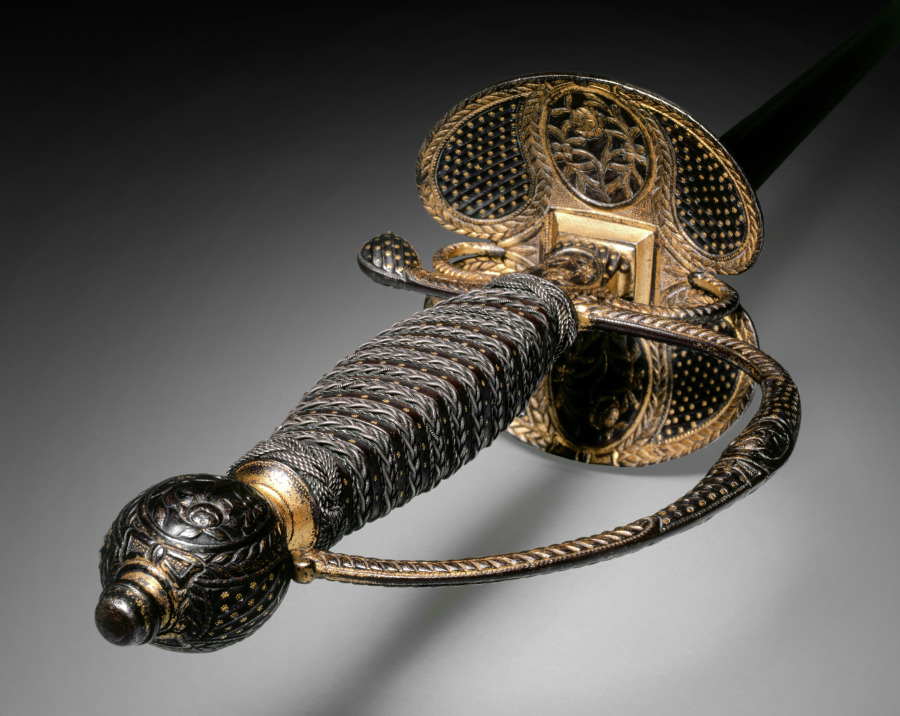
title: Small Sword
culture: France, Paris (?), 18th century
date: c. 1780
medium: forged steel blade; partially gilt and russet steel hilt; steel wire, leather bands, wood core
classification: Arms and Armor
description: During the 1700s, the small-sword emerged as a light, quick weapon. Like the rapier it was carried by unarmored civilians, the noblemen of the upper classes. Over time this delicate sword became more an accessory of male attire than a weapon essential to life and death. The sword hilt, which shows even when the blade is sheathed, became the ground for elaborate decoration. These small-swords thus represent the final stage in the evolution of the sword, from the edged weapons of antiquity to the elegantly refined blades of the 1700s and 1800s.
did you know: The fashion among gentleman for wearing small-swords with everyday attire began to wane by the end of the 1700s with the exception of the military dress sword.